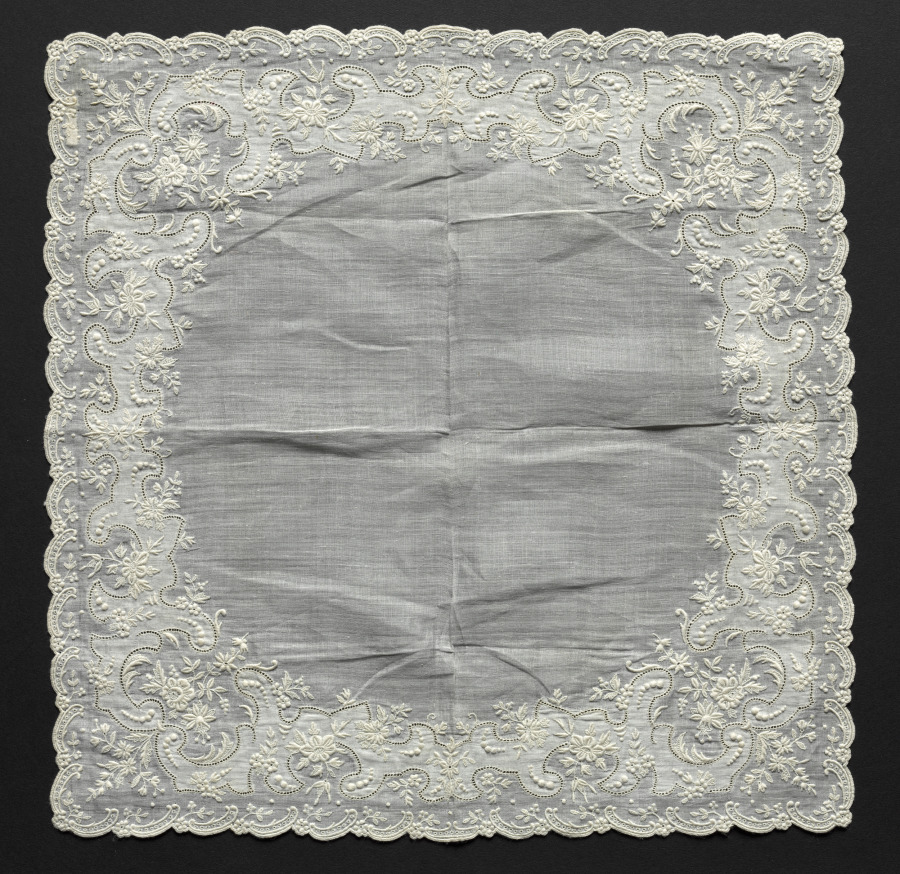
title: Handkerchief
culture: Switzerland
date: 1900s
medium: Plain weave linen: embroidered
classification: Embroidery